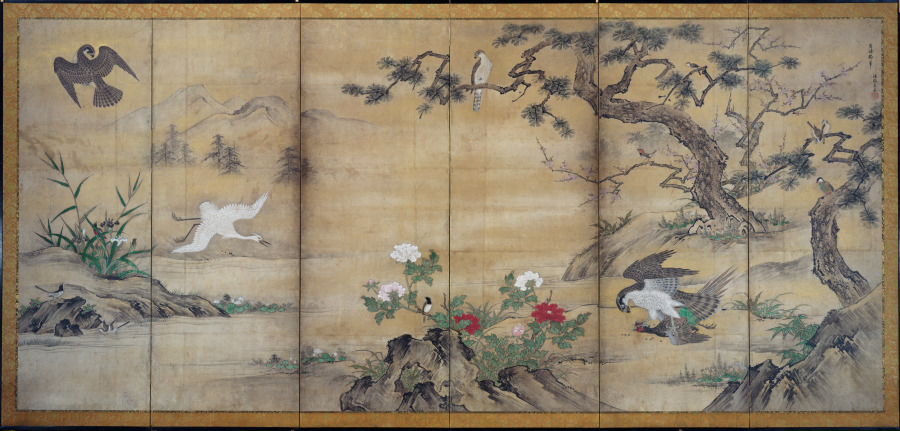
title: Birds and Flowers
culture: Japan, Momoyama period (1573–1615)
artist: attributed to Kano Shōei (Japanese, 1519–1592)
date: late 1500s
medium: One of a pair of six-panel folding screens; ink, color, and gold on paper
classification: Painting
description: The landscape depicted in this pair of screens follows a seasonal progression from right to left, starting with the blossoming plum of early spring and ending with late autumn peonies. A variety of smaller birds are positioned throughout the scene, and a trio of swimming ducks is bracketed by early summer irises and early autumn bellflowers at the center. While some raptors (birds of prey) terrorize a pheasant and an egret (a waterfowl) to the right, a peacock and peahen converse to the left. Hawks are associated with military prowess, while the peafowl suggest cultural prestige.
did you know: Military class patrons frequently requested scenes depicting predation, such as hunting scenes that were inserted as additional subject matter in otherwise tranquil vistas celebrating flora and fauna.